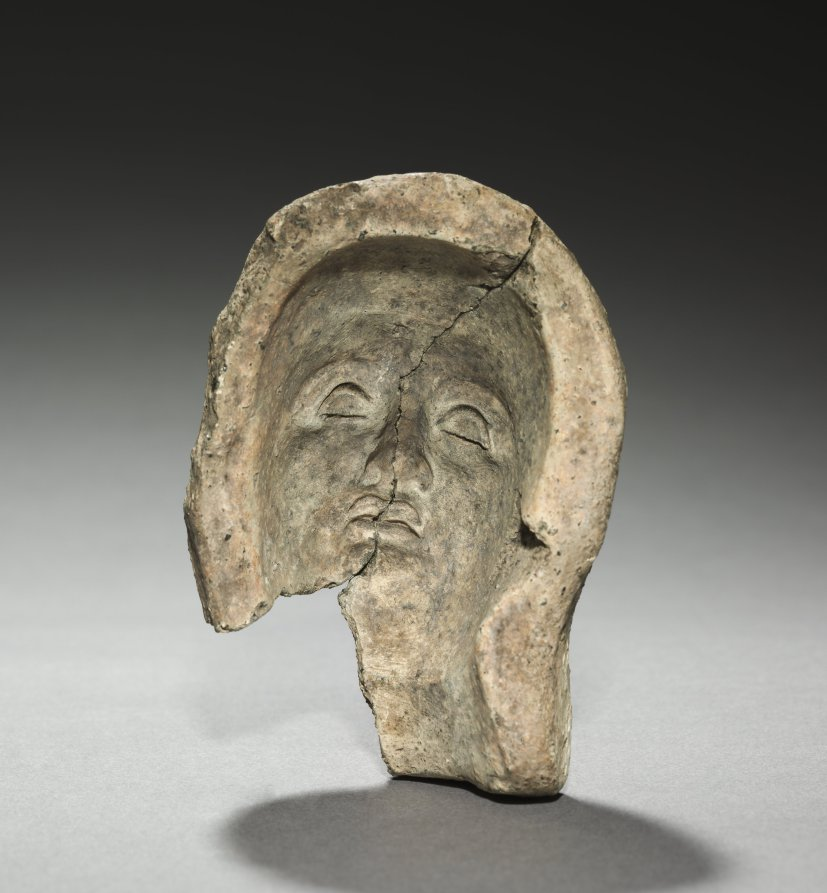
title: Mold for a Male Head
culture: Italy, Roman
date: 1–300 CE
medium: terracotta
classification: Sculpture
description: Now cracked and fragmentary, this terracotta mold would have been used to produce a male head, also of terracotta. Modern impressions, whether made physically (with clay or other material) or digitally, can approximate the appearance of ancient objects made with this mold, albeit without added pigment. Separate molds may have been used to create a back for the head, and perhaps a body as well.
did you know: Because this is a mold, its facial features would be reversed in the final product.